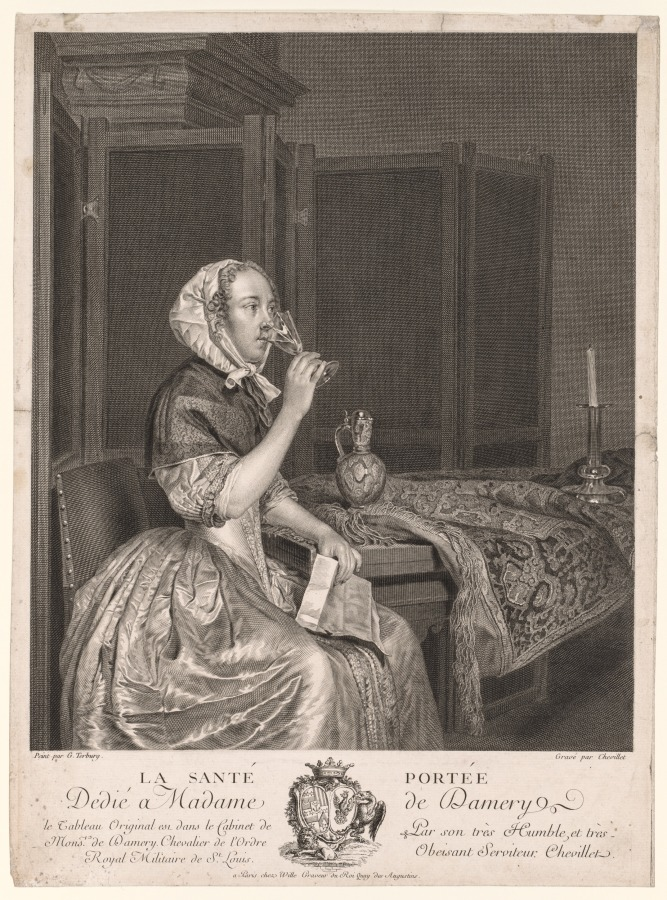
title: Drinking a Toast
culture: Netherlands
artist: after Gerard ter Borch (Dutch, 1617–1681)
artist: Justus Chevillet (French, 1729–1802)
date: c. 1750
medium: engraving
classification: Print